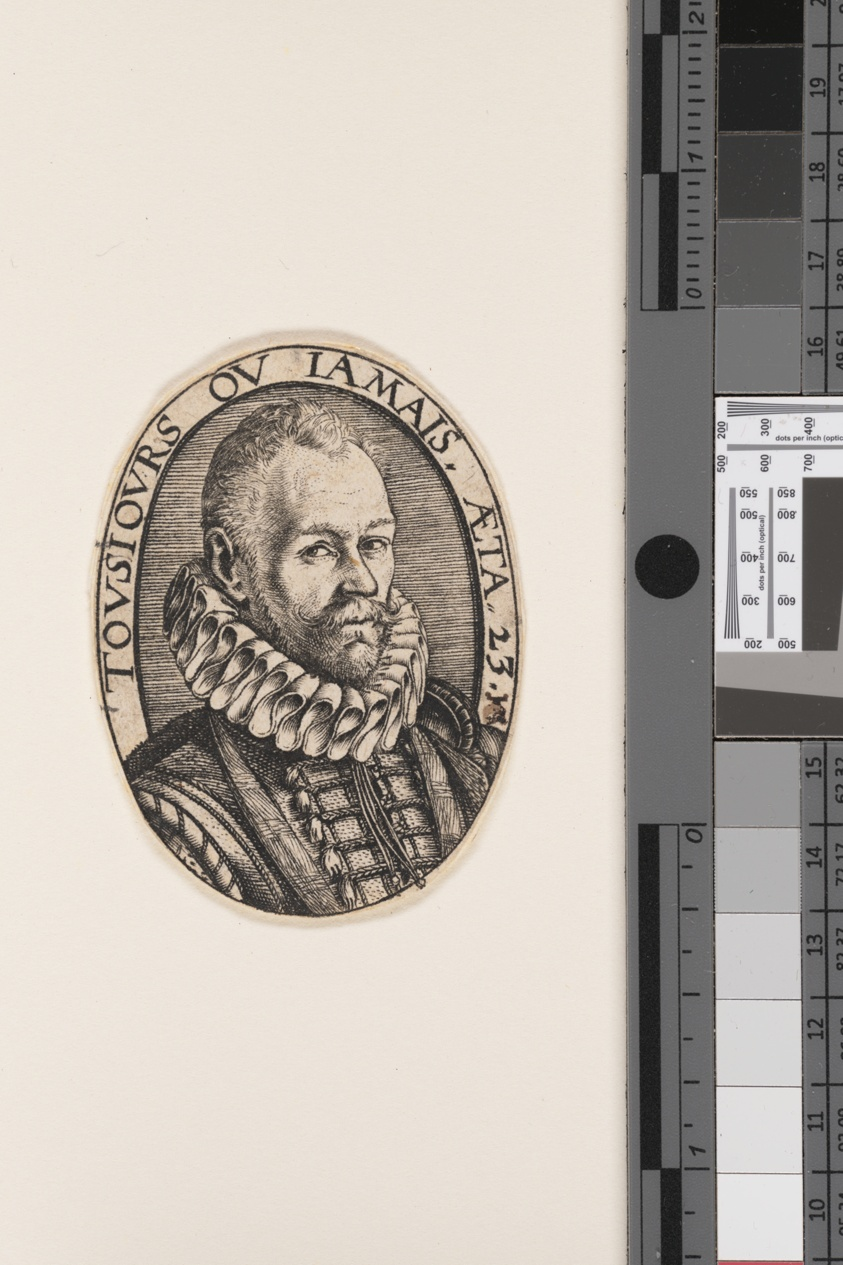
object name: Print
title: Arnout van Beresteyn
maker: Hendrick Goltzius (Dutch, 1558–1617)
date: 1579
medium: Engraving on paper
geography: Netherlands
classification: engraving; paper; print; prints and drawing